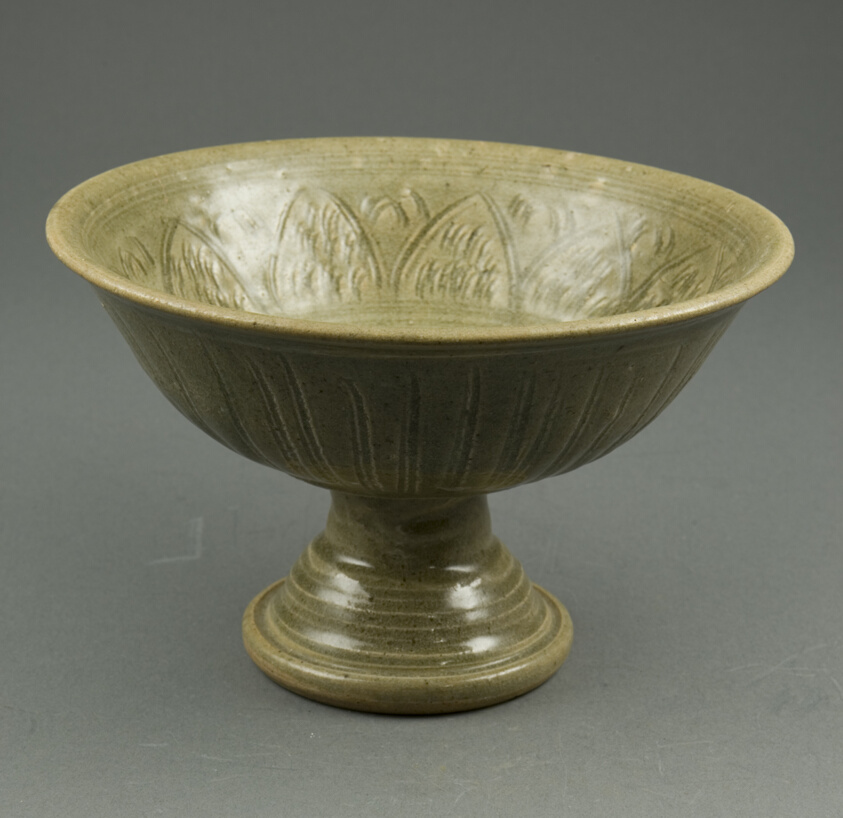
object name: Decorative Arts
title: Sawankhalok Ware Stem Bowl with Incised Lotus Petal Design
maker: Thailand; Sukhothai Province, Si Satchanalai, Sawankhalok Kilns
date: 15th century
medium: Stoneware with celadon glaze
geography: Thailand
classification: stoneware; decorative arts